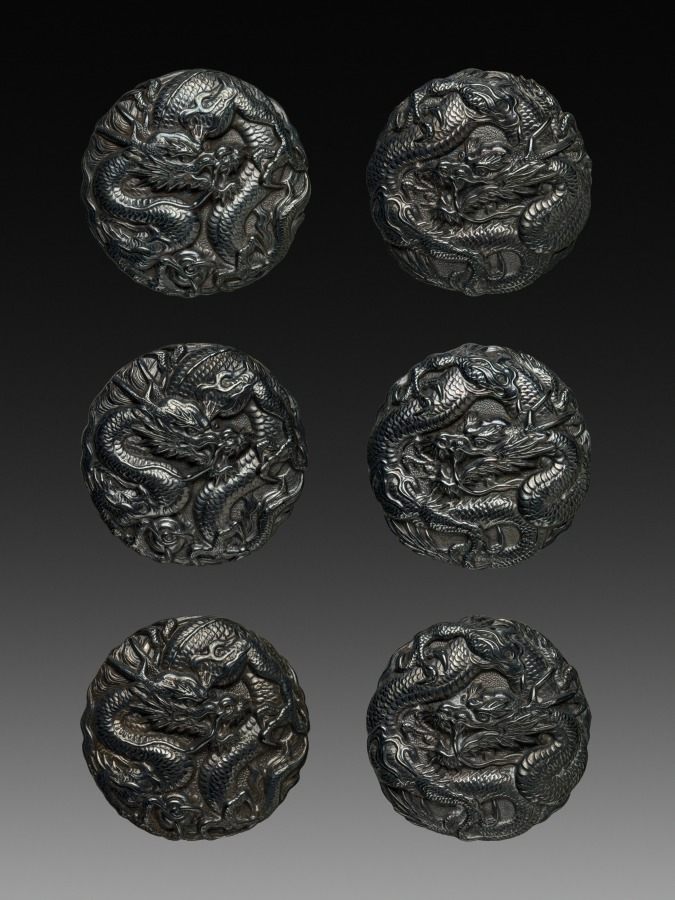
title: Buttons with Dragon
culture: Japan, Meiji period (1868–1912) or Taishō period (1912–26)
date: early 1900s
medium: Set of six buttons; cast (?) silver with relief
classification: Metalwork